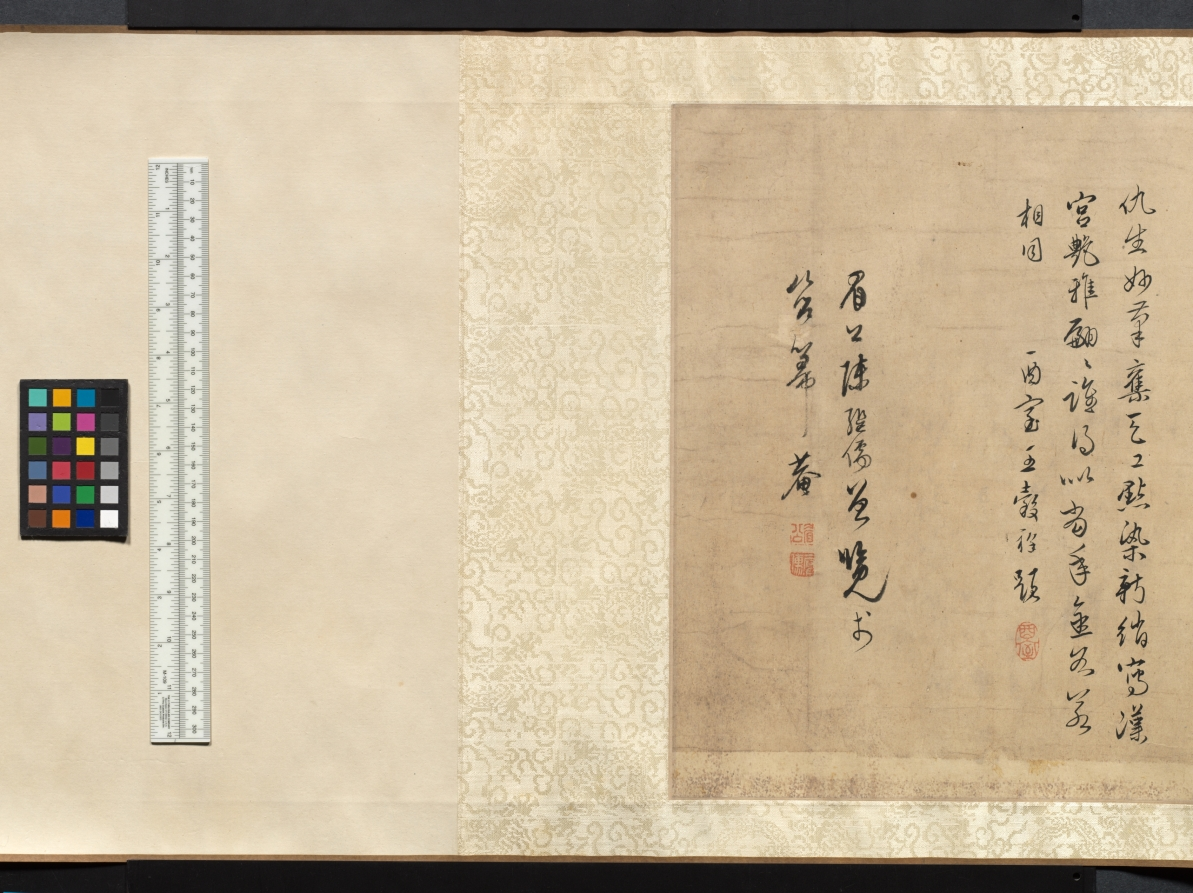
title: Palace Ladies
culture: China, Qing dynasty (1644-1911)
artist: copy after Qiu Ying (Chinese, 1494–1552)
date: 1644–1911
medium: handscroll, ink and color on silk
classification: Painting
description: This handscroll illustrates the pursuits of court ladies in a palace precinct on a spring day. Women, young girls, and their maids amuse themselves by sitting on a swing, playing games, watering and admiring peonies, performing music together, playing the qin (zither), feeding a parrot on the balustrade and fish in the water, or catching butterflies. The life of elite women was mostly restricted to the so-called inner quarters, meaning the garden and inner courts of the house. This painting idealizes the world of young palace girls that in fact was often filled with boredom and waiting for a lover.